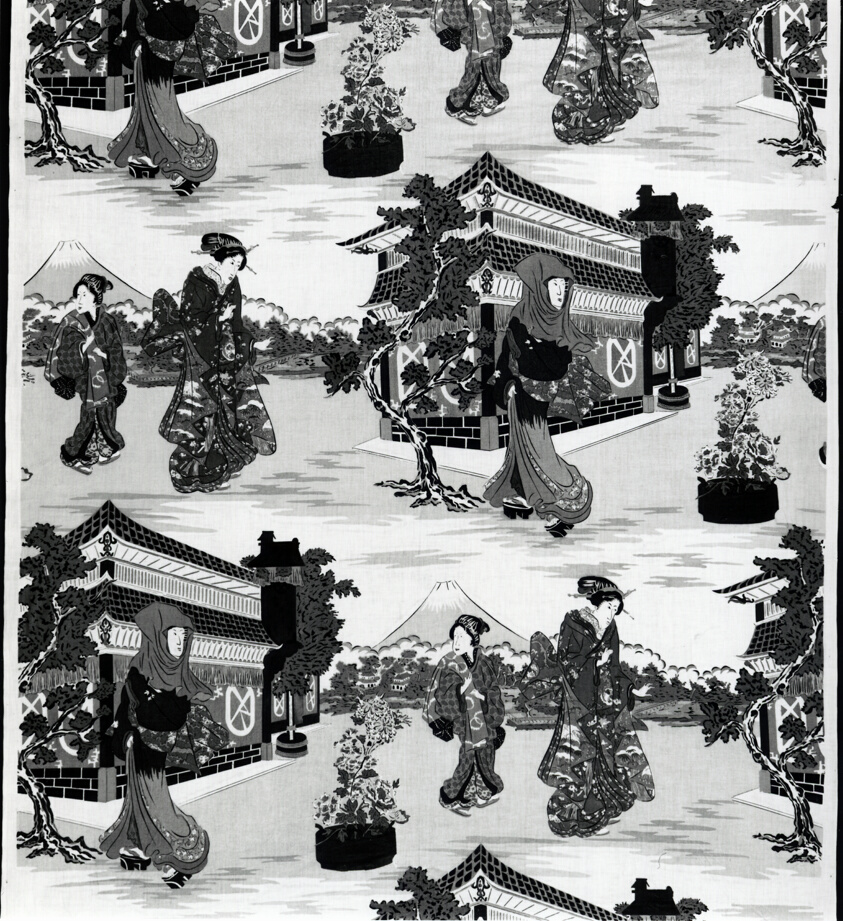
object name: Textile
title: Panel (Furnishing Fabric)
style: 21st Century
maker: Possibly after Utagawa Kunisada (Japanese, 1786-1865); England or United States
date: 20th century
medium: Cotton, plain weave; block printed; glazed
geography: Europe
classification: textile; weaving - printed; weaving; furnishing textile